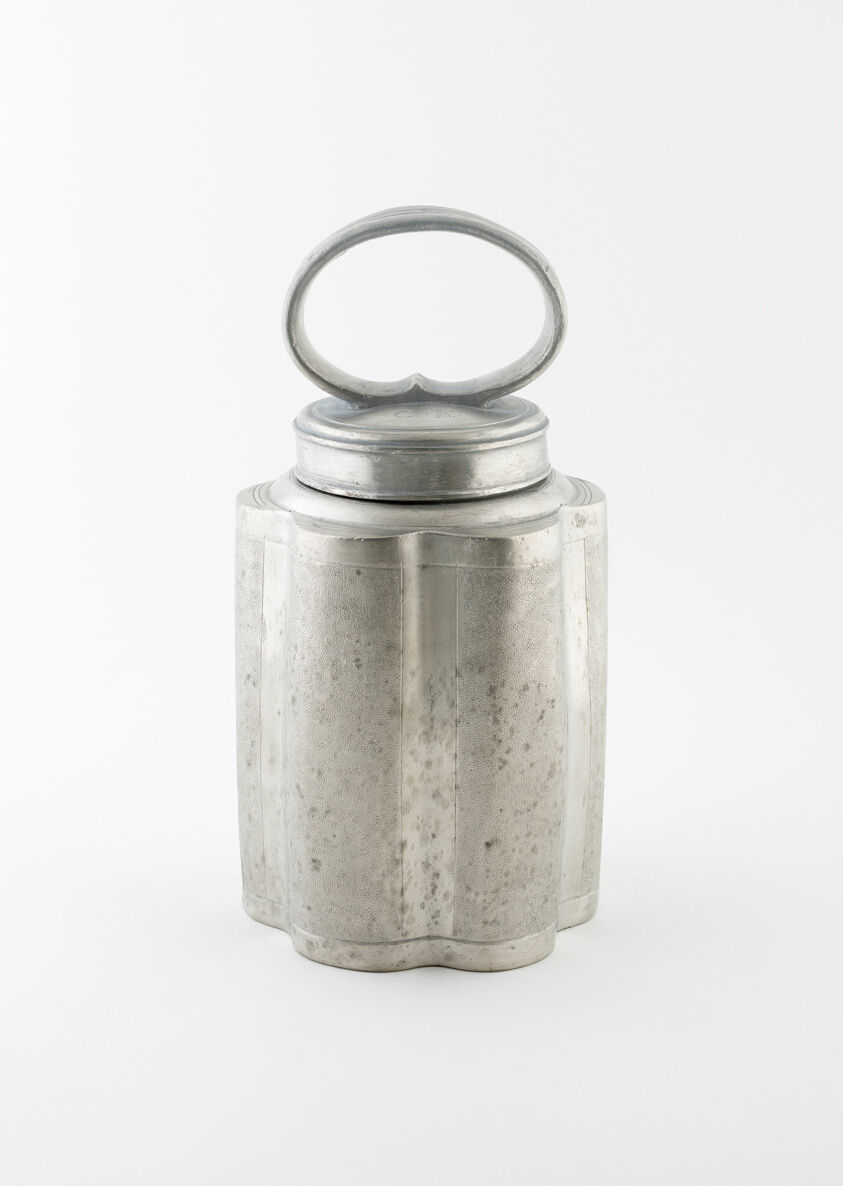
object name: Metalwork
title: Wine Can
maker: Johann Georg Teufel; German, active 1756-1782; Germany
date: c. 1760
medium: Pewter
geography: Munich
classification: pewter; metalwork; european decorative arts